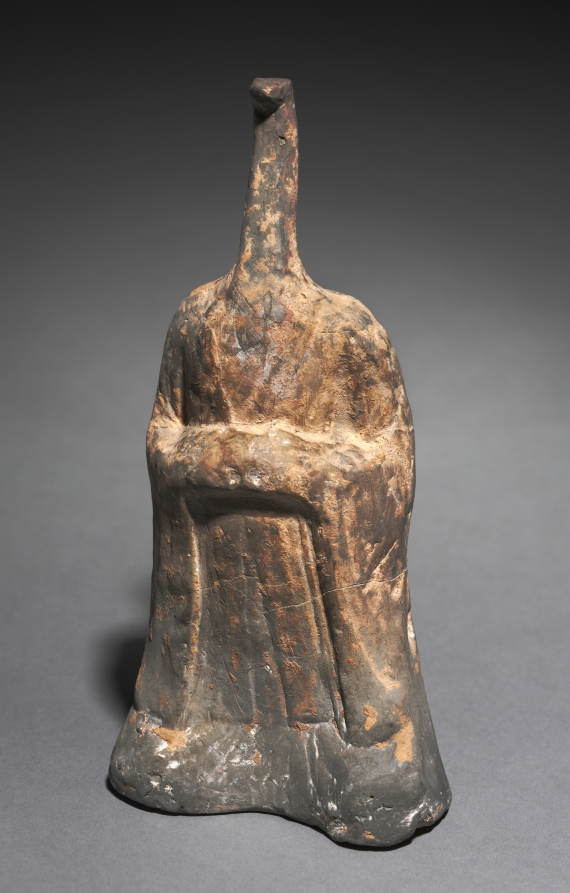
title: Mortuary Figure of the Zodiac Sign: Serpent (Virgo)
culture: China, Northern Wei dynasty (386-534)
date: 500s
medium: gray earthenware with traces of slip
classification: Sculpture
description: The twelve-animal zodiac series—rat, ox, tiger, rabbit, dragon, snake, horse, goat, monkey, rooster, dog, and boar—signifies a traditional Chinese concept of time structured in a cyclical order. The twelve animals are also linked to the art of fortunetelling that underlies human existence in connection with the changes of the universe. The use of the twelve zodiac animals as tomb furniture suggests they provided a cosmological structure for the afterlife.